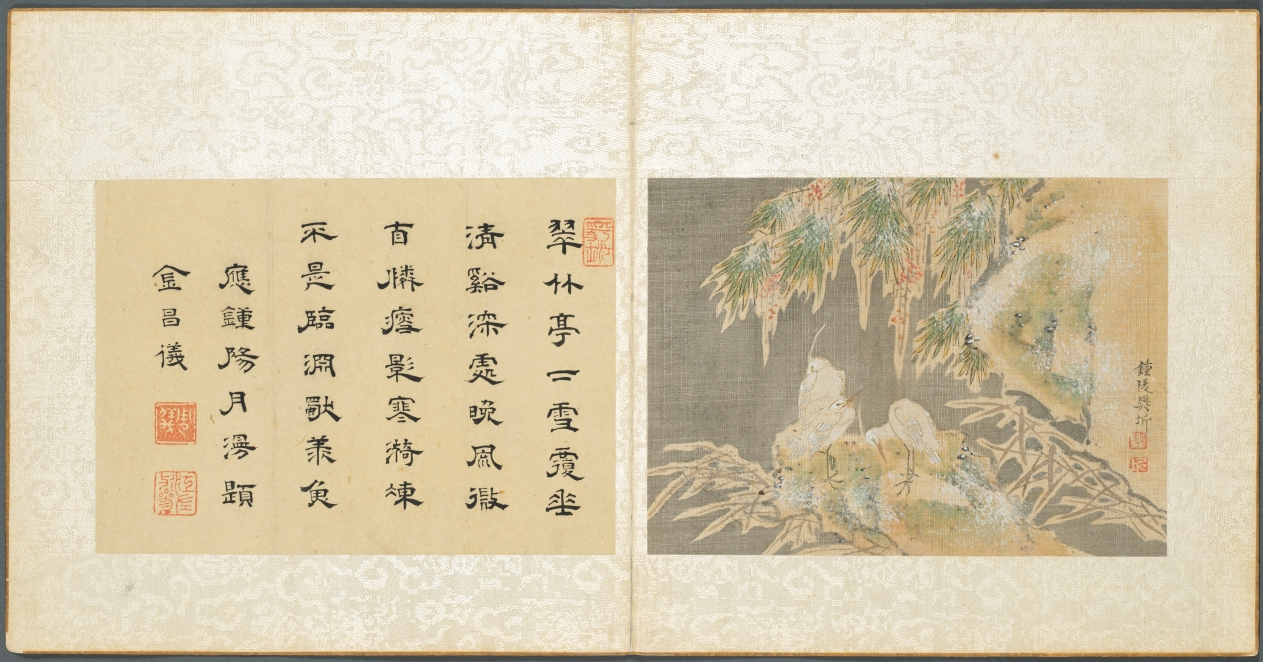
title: Album of Miscellaneous Subjects, Leaf 10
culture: China, Qing dynasty (1644-1911)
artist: Fan Qi (Chinese, 1616–after 1694)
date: early 1650s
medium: album leaf, ink and color on silk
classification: Painting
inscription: Artist's signature: Zhongling Fan Qi 鐘陵樊圻 ["Fan Qi of Zhongling" (Zhongling is another name for Nanjing.)]. Artist's seals: Fan Qi 樊圻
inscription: Poem by Zhou Yi 周儀 (mid 17th century–about 1705): Green bamboo stand alone with a snowy covering,/ In the deep recesses of a secluded valley, the evening breeze is light./ White egrets are lean as shadows with the cold ripples frozen,/ They enter the gorge not just to admire the fish.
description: Leaf 10 Zhou Yi's colophon reads: Green bamboos stand alone with a snowy covering, In the deep recesses of a secluded valley, the evening breeze is light. White egrets are lean as shadows with the cold ripples frozen, They enter the gorge not just to admire the fish.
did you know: Icicles encase the leaves and red berries of the Nandina domestica (Heavenly Bamboo).